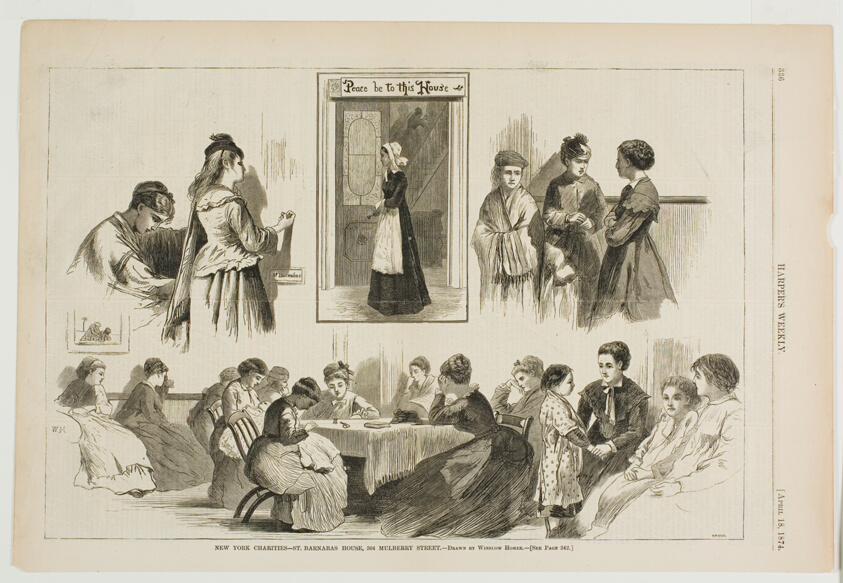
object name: Print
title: New York Charities—St Barnabas House, 304 Mulberry Street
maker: Winslow Homer (American, 1836-1910); published by Harper's Weekly (American, 1857-1916)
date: published April 18, 1874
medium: Wood engraving on paper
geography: United States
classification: wood engraving; print; prints and drawing